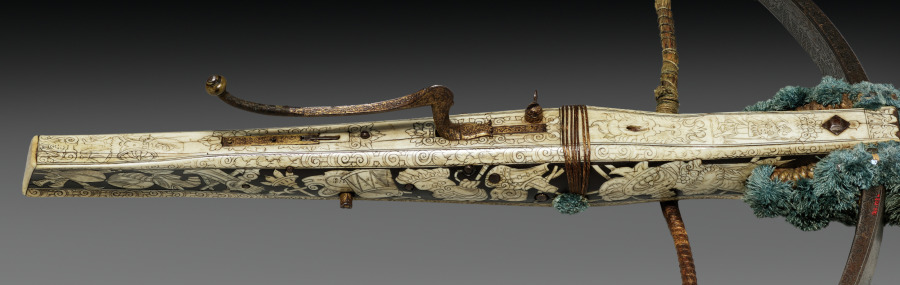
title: Crossbow of Elector Augustus I of Saxony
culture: Germany, Saxony, 16th century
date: c. 1553–73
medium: wood (walnut?), bone veneers, flax cord, steel (etched, traces of gilding). woolen pompoms, stock decorated wih inlaid trophies of arms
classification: Arms and Armor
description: This crossbow was a hunting weapon for Prince Elector Augustus I, a member of the ruling elite in the Holy Roman Empire. Augustus, powerful and wealthy, had even the most practical instruments ornately decorated, including this crossbow and its cranequin, or winding device.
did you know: Augustus was a marksman who took part in crossbow competitions. He had a large collection and often gave them to friends.